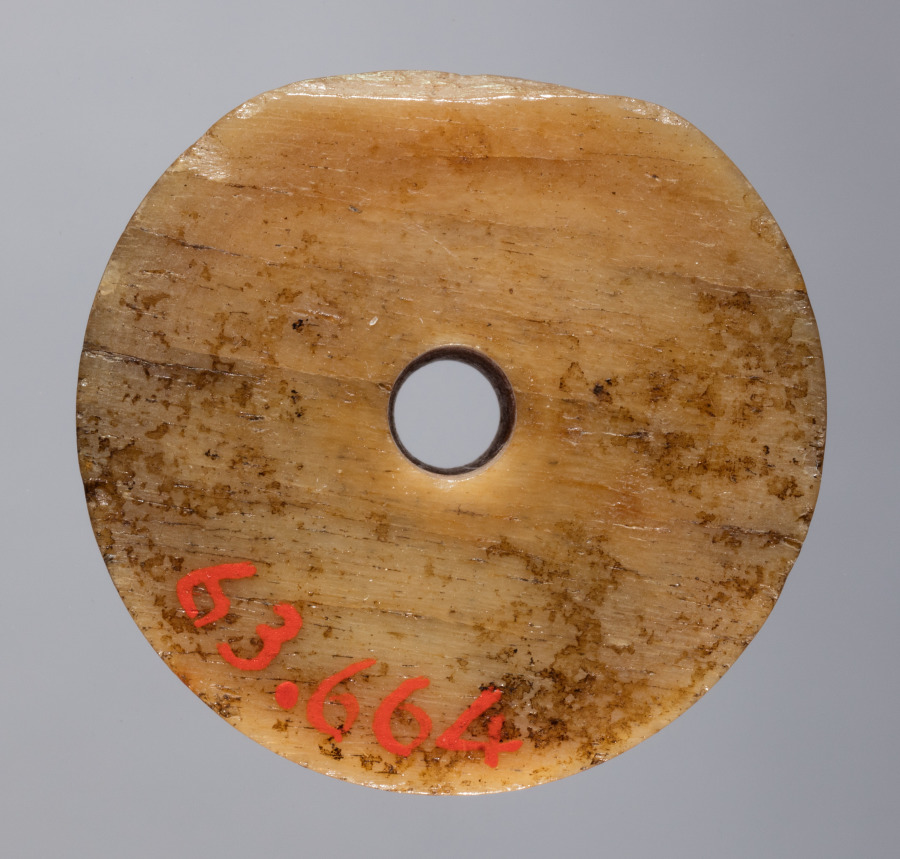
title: Spindle Whorl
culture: Iran, early Islamic period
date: 700s - 900s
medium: bone, incised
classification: Spindle Whorl